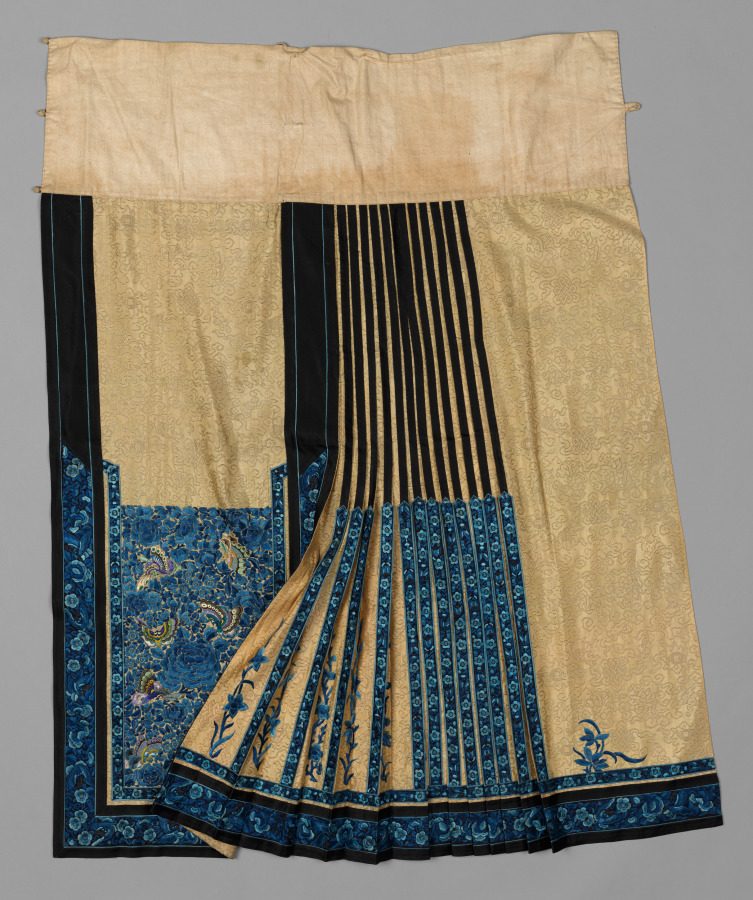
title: Skirt (Part 2)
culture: China, Qing dynasty (1644–1911)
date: late 1870s–early 1880s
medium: Silk, embroidery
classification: Garment